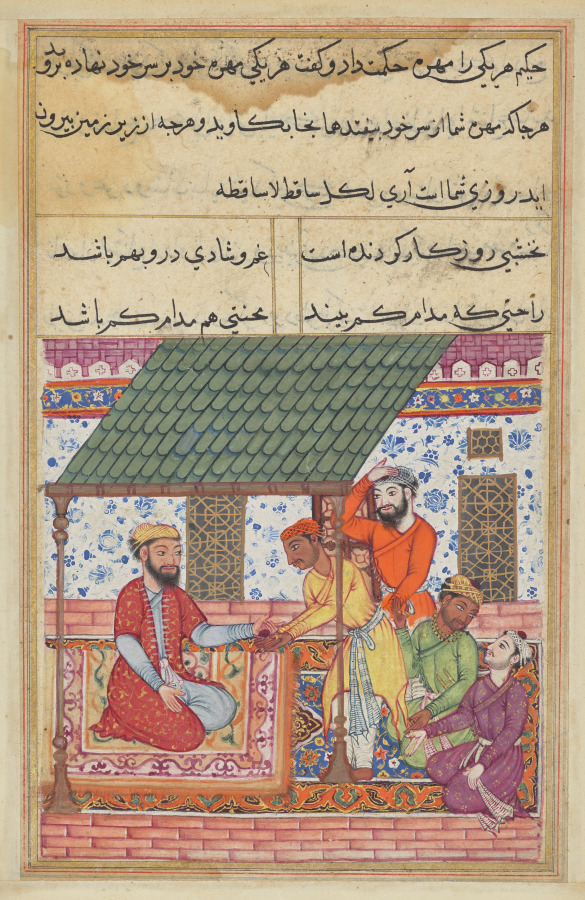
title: The four destitute friends go to a wise man who gives each one of them a magic shell to be placed on top of the turban, from a Tuti-nama (Tales of a Parrot): Forty-seventh Night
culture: Mughal India, court of Akbar (reigned 1556–1605)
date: c. 1560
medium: gum tempera, ink, and gold on paper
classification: Painting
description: The seated wise man drops a small, red shell into the final friend’s outstretched hands. He then instructs each of them to go out into the world and walk until the shell falls to the ground. If the man digs where the shell lands, he will find something to sustain him.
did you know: This story takes place in Balkh, a city in northern Afghanistan.